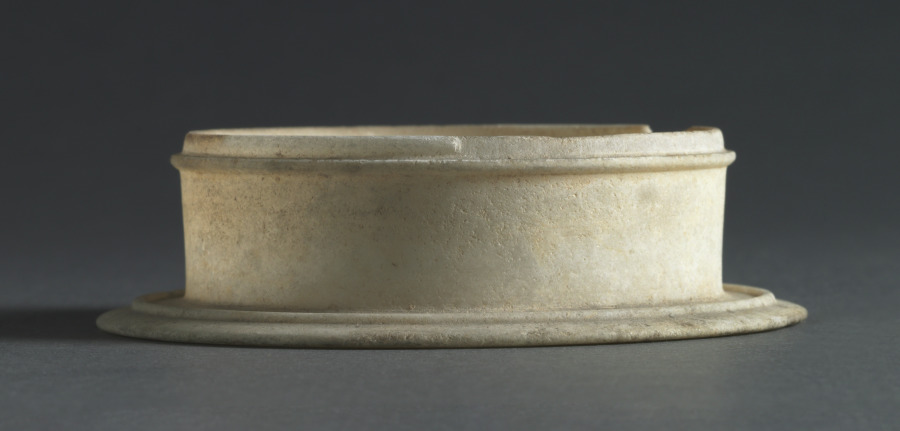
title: Pyxis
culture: Greece, Attic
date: 400–300 BCE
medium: marble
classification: Stone